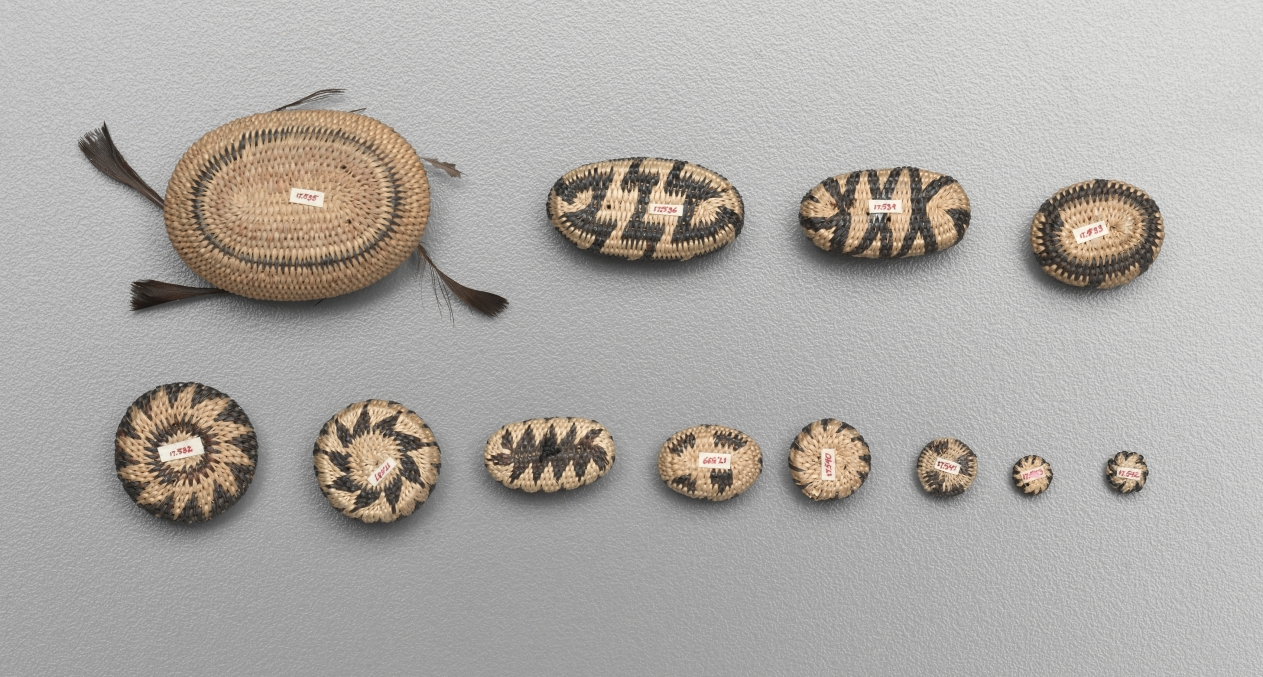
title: Miniature Round Basket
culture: California, Pomo, late 19th-early 20th century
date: late 1800s-early 1900s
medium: plant materials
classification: Basketry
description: Miniature baskets were made to demonstrate the basket-maker’s virtuoso skill, and these tiny marvels seem to be no exception—the smallest are just a few millimeters wide but still patterned. For such fine work, dexterity was required as much for preparation of materials as for weaving.